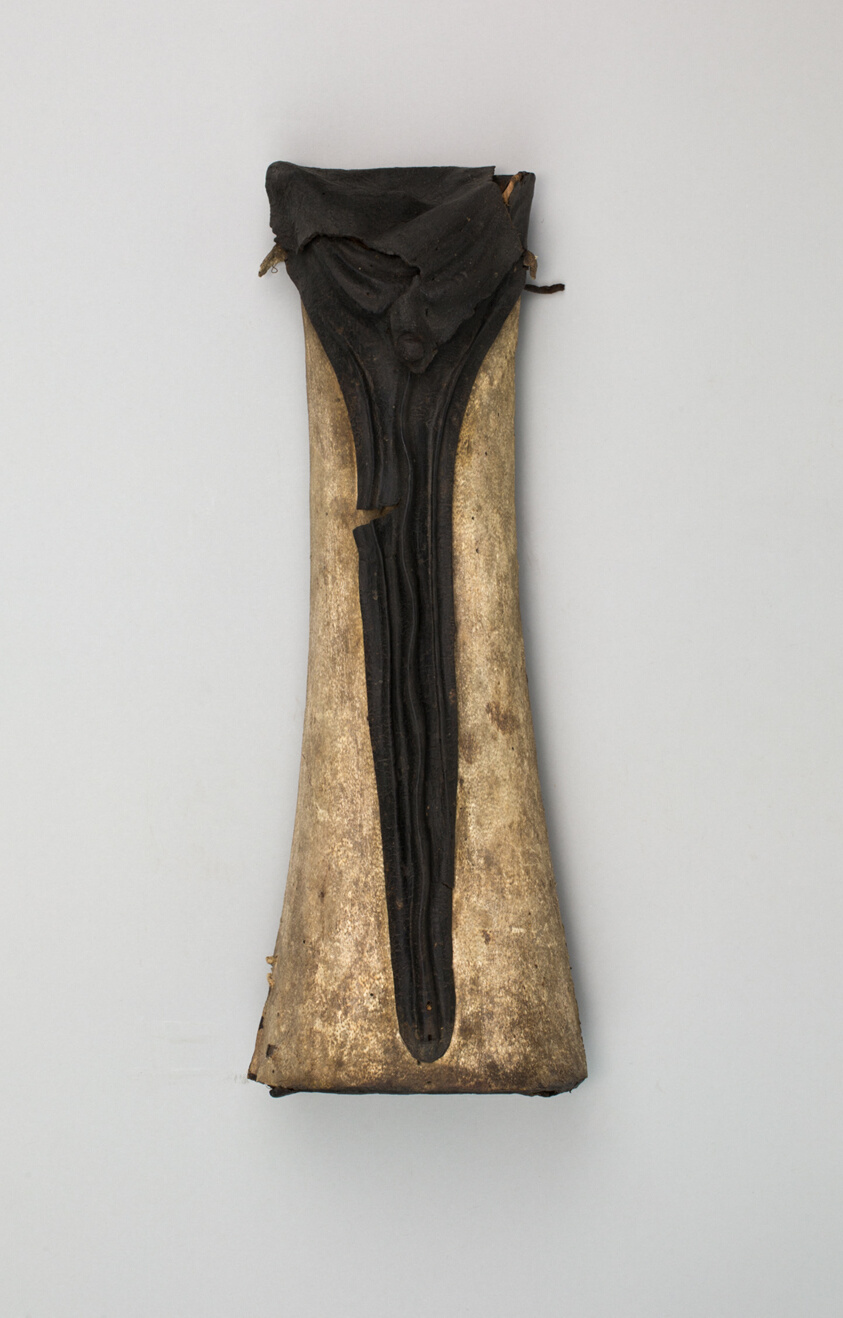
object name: Arms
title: Quiver for Crossbow Bolts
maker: German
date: c. 1480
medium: Wood, leather, and boar skin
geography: Ancient Europe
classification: crossbow; arms; arms and armor